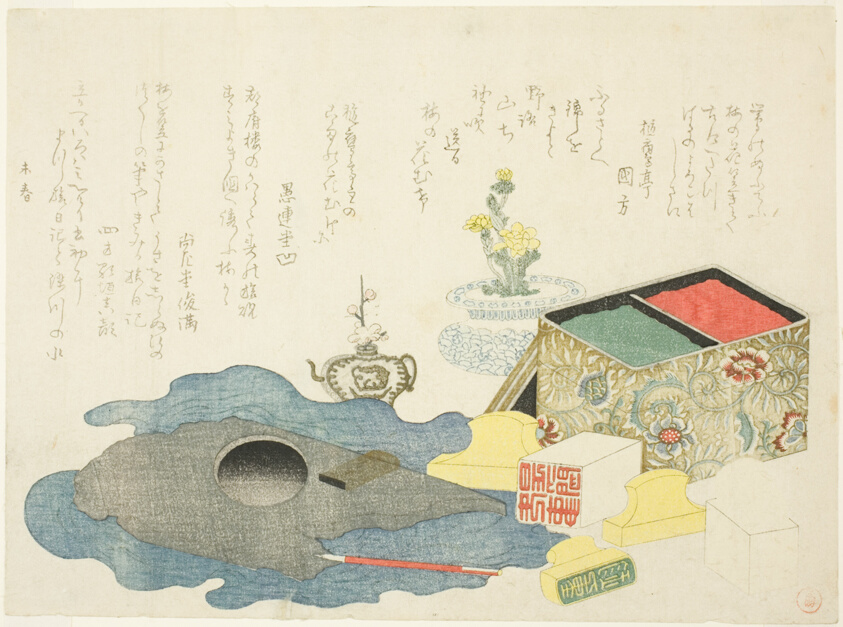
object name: Print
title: Writing Implements and Seals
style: Japanese (culture or style)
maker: Kubo Shunman (Japanese, 1757–1820)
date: 1799 or 1811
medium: Color woodblock print; horizontal chuban, surimono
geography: Japan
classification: woodblock print; print; asian art